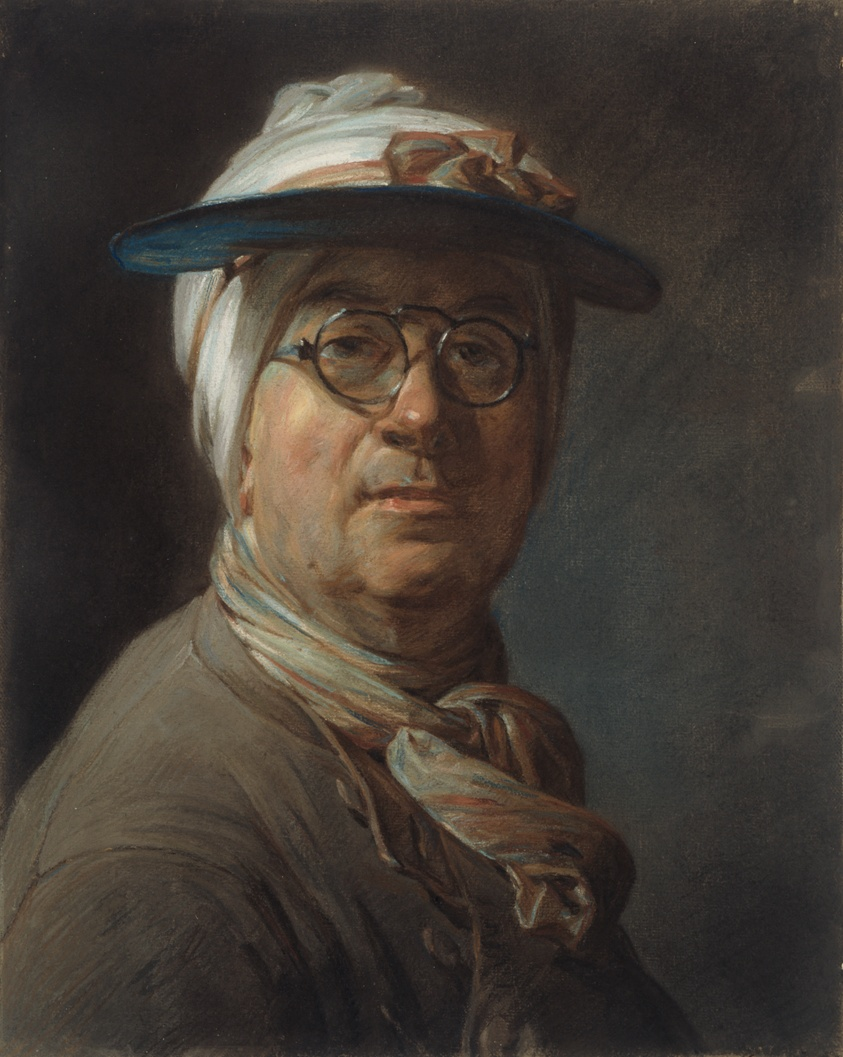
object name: Drawing and Watercolor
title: Self-Portrait with a Visor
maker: Jean-Siméon Chardin; French, 1699-1779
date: c. 1776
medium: Pastel on blue laid paper, mounted on canvas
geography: France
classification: pastel; drawings (visual works); prints and drawing; paper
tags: men, glasses, fashion, hats, portraits